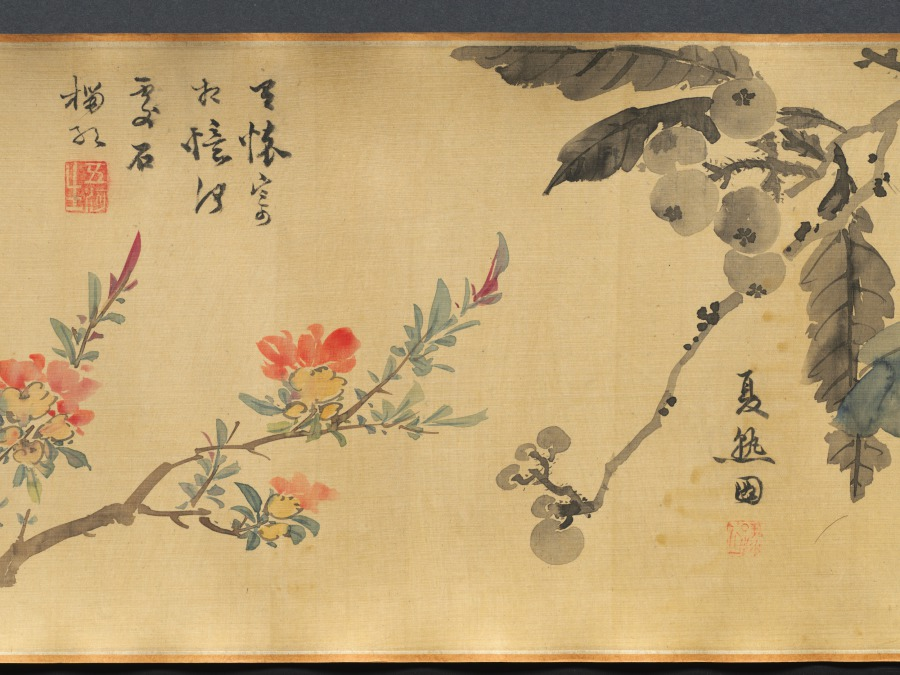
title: Flowers of Four Seasons, with Poems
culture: China, Ming dynasty (1368–1644)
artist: Wang Guxiang (Chinese, 1501–1568)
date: 1531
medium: handscroll; ink and light color on silk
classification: Painting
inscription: Artist's inscription, signature, and 15 seals. Ink Orchids. Sewn as pendants for the man of worth, swaying quiety, fragrance in the valley. [seal] Hsiao-chu ts'un Peony. Wiping his face, the young gentleman Ho [Ho Yen of Wei, Three Kingdoms] appears to have been powdered. His previous life was the perfume-stealing Han Shou [of Chin, 265–419 CE], the fragrance still lingers. [seal] Ts'un-wu chai. Flowering Crab Apple, New Bamboo. Shao-lin [Du Fu, 712–770] had to put down his brush. [Flowering Crab Apple]. Yü-k'o [Wen T'ung, d. 1079) in vain wrote poems about [Bamboo]. [seal] Yu-shih. Lotus Flowers. When she turns her head, half-hidden by a fan, and casts a glance, all the beautiful women become colorless. [seal] K'ang yüeh huai. Loquat. Ripeness in summer. [seal] Lu-chih. Pomegranate Flower. Whenever I remember you I will send my thoughts, but where have you gone--the [skirt] of pomegranate red? [seal] Wu-ho Sheng. Day Lily. Plant the day lily to forget sorrow. [seal] Yu-shih. Chrysanthemum. The untrammelled joy at the eastern fence. [seal] Lu-chih. Begonia. Comparing it to the beauties of Spring, and spreading them out as trimming for the stone steps. [seal] Yu-shih. Hibiscus. In recent years I have always enjoyed looking at flowers; instead of dark red I preferred pink ones. [seal] Jen-sheng i-lou. Narcissus, Camellia. The jade girdle left behind at Lo River. [Narcissus]. The precious pearls glitter before Spring. [Camellia]. [seal] Lu-chih. Heavenly Bamboo (Nandina domestica). A single branch in the wintry season. [seal] K'ang yüeh huai. Plum. Fragrant snow in the Lo-fou Mountains. [seal] Ts'un-wu chai. In the eleventh lunar month of the hsin-mao year of the Jiaqing era [1531], [I] imitated the boneless style of Yüan masters in sketching from life. Guxiang [seals] Yu-shih; Lu-chih. Translated by Wai-kam Ho/Lingyun Shih Liu (1980)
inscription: 2 colophons and 23 additional seals: 1 colophon dated 1632, and 2 seals of Li Jih-hua [Li Rihua] 李日華 (1565–1635); 1 colophon and 2 seals of Xiang Shengmo 項聖謨 (1597–1658); 3 seals of Liang Qingbiao 梁清標 (1620–1691); 6 seals of the Jiaqing 嘉慶 emperor (r. 1796–1820); 9 seals of Ch'eng Ch'i [Cheng Qi] 程琦 (1911–1988)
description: In this painting, flowers are loosely arranged by the seasons: narcissus and peony represent early spring; yellow loquat and lotus, summer; chrysanthemum, autumn; and the plum and evergreen bamboo, winter. The artist added to each flower a poetic line of calligraphy associating each plant with a historic or legendary figure. For example, the chrysanthemum, along with the line “The untrammeled joy at the eastern fence,” refers to the poet Tao Yuanming (died AD 427) who enjoyed chrysanthemums at the eastern fence in his garden. The scroll illustrates Wang Guxiang’s mastery of free brushwork, combining light monochrome ink with transparent colors. In his inscription, Wang says he used the “boneless” style without outlines as developed during the Yuan dynasty (1279–1368). Wang was a native of Changzhou, a city in southeast China known for its rich flora and fauna, and flower-and-bird painting tradition.